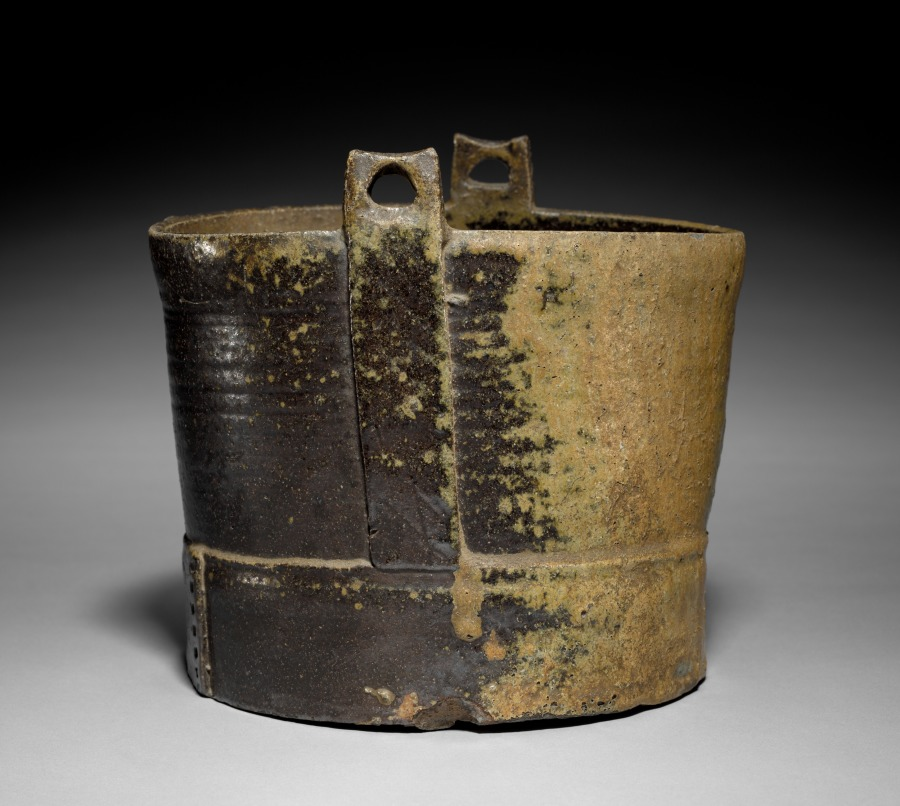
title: Water Container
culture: Japan, Momoyama period (1573–1615)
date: early 1600s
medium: glazed stoneware (Bizen ware, Imbe type)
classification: Ceramic